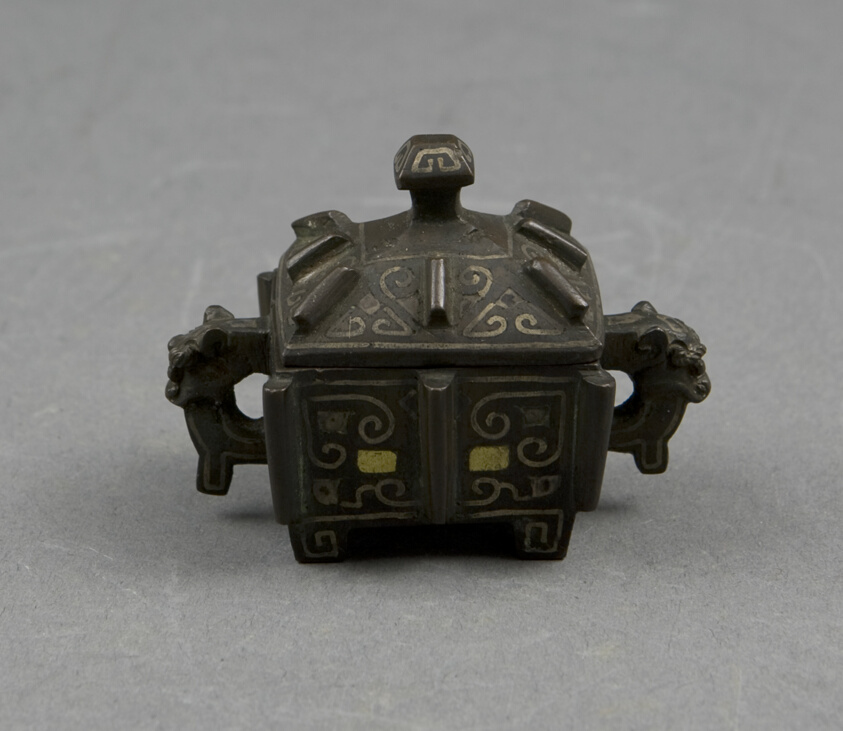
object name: Religious/Ritual Object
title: Miniature Vessel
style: Chinese (culture or style)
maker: China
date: Ming dynasty (1368–1644) or Qing dynasty (1644–1911)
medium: Bronze with inlay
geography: China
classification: bronze; metal; decorative object/ornament; asian art; ritual objects